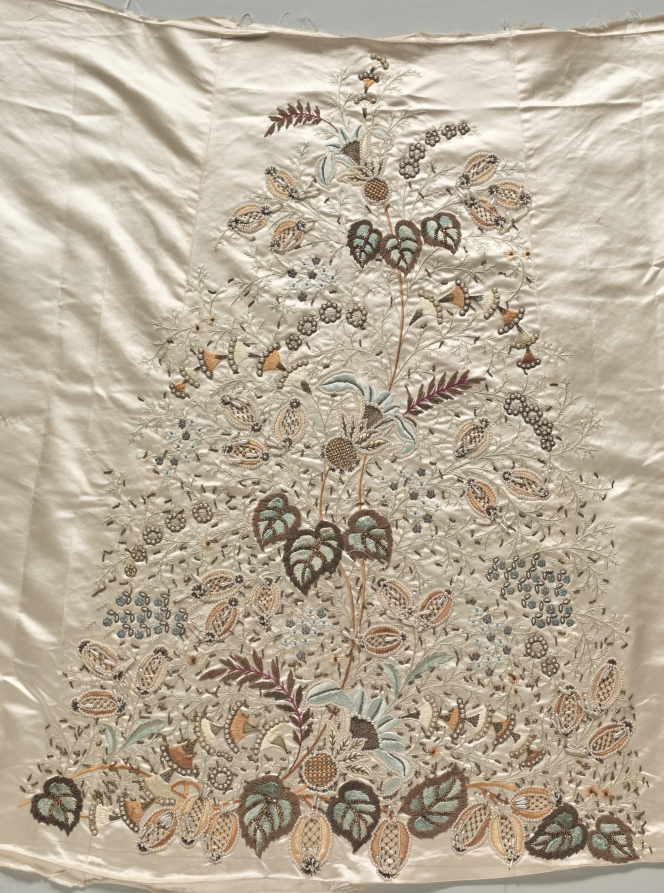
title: Embroidered Skirt Panel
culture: France, 19th century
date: 1800s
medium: embroidery on satin; silk and beads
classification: Embroidery